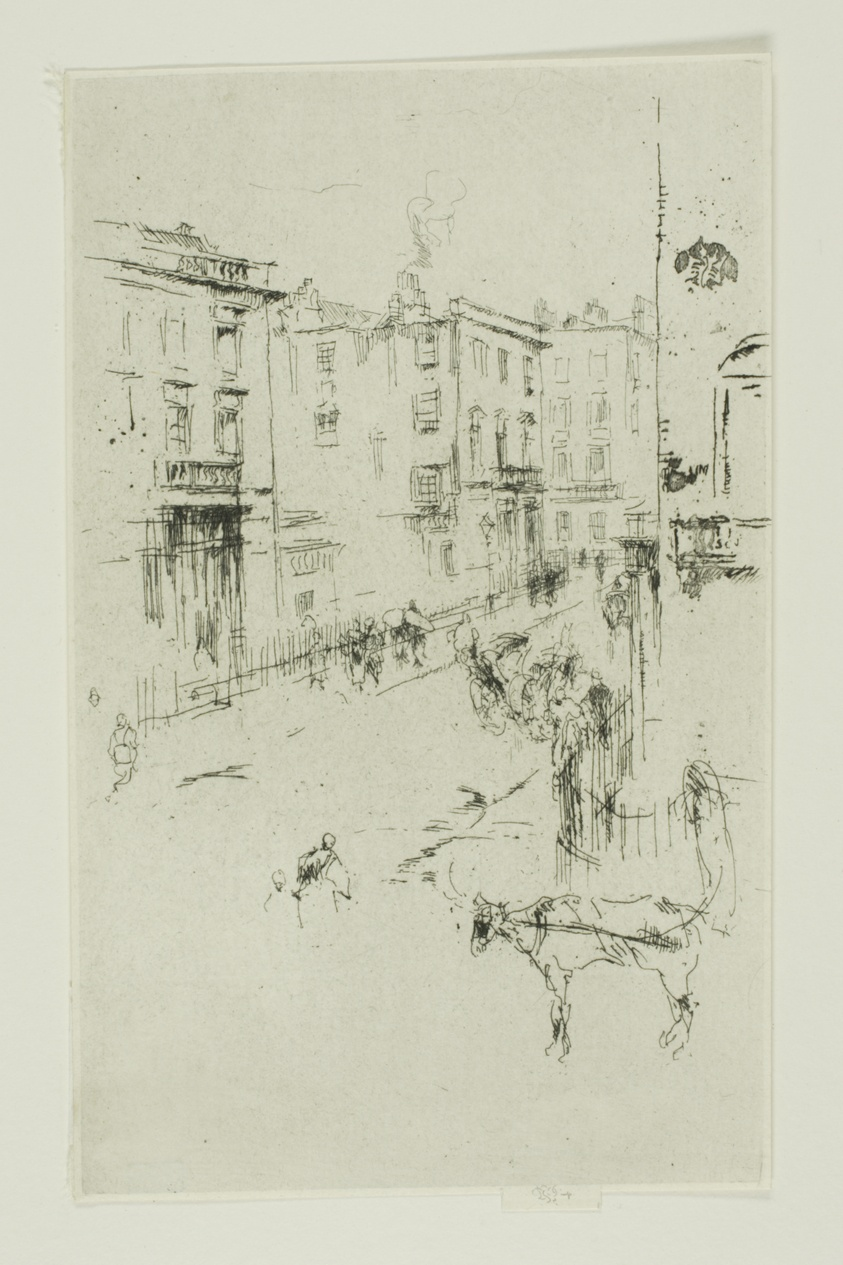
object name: Print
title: Alderney Street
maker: James McNeill Whistler (American, 1834-1903)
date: 1881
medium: Etching with foul biting in black ink on ivory laid paper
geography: United States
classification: etching; foul biting; print; prints and drawing; paper